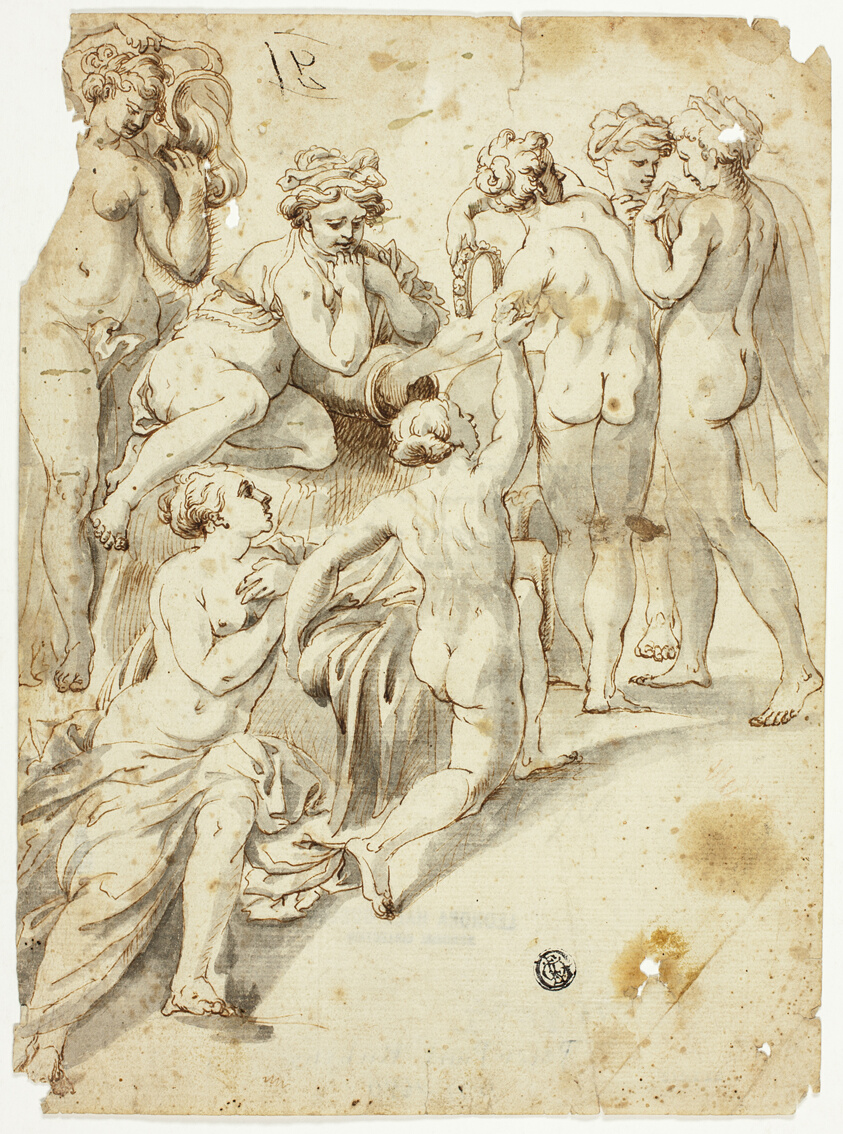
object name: Drawing and Watercolor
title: Nymphs Bathing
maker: Possibly Giulio Testone (Italian, active 1670); or Peter Paul Rubens (Flemish, 1577-1640)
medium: Pen and brown ink, with brush and gray wash, over traces of graphite, on ivory laid paper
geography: Flanders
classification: pen and ink drawings; drawings (visual works); prints and drawing